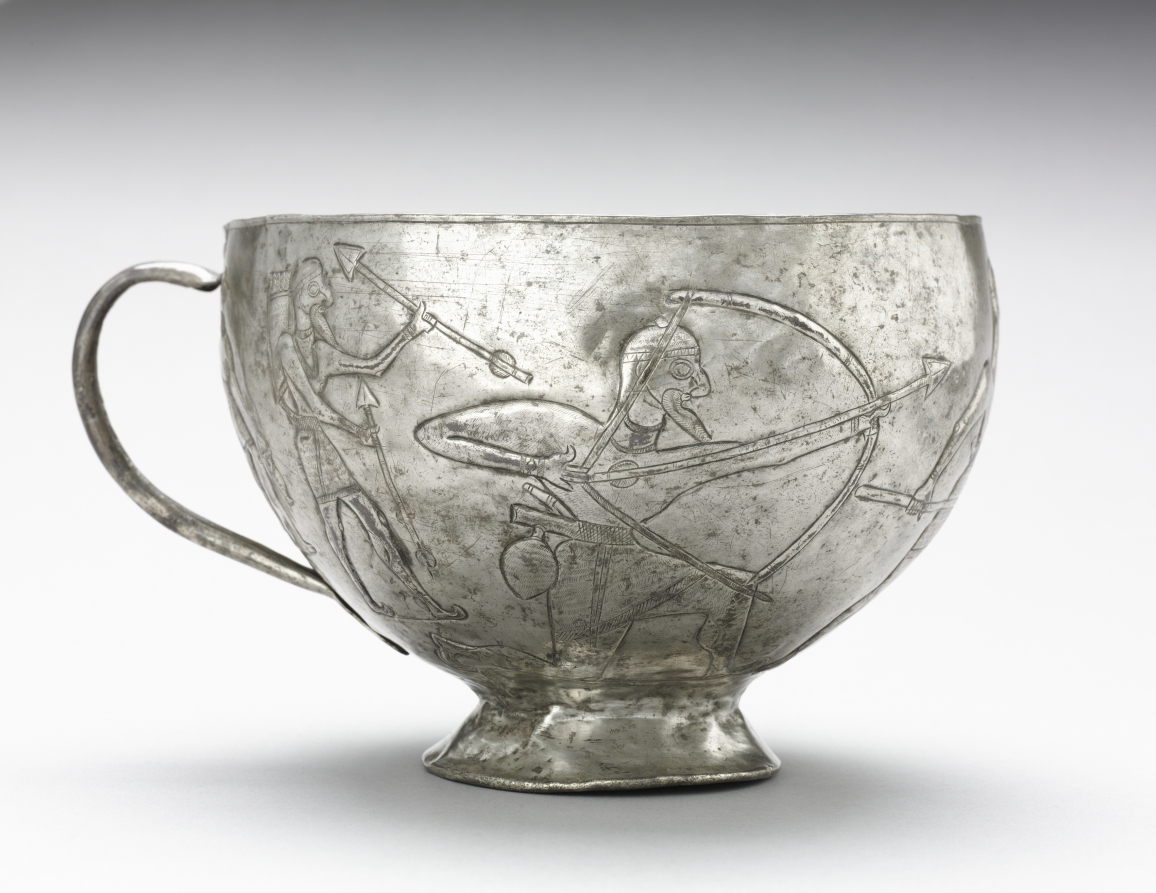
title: Lion Hunting Cup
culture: Iran, Amlash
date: 1100–1000 BCE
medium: silver, raised, chased, repoussé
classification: Metalwork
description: The nomadic gold- and silversmiths of Marlik and Amlash were the first masters of precious metalwork in Iran. Their successors were the bronze workers of Luristan and the silversmiths of the Achaemenian and Sasanian empires.